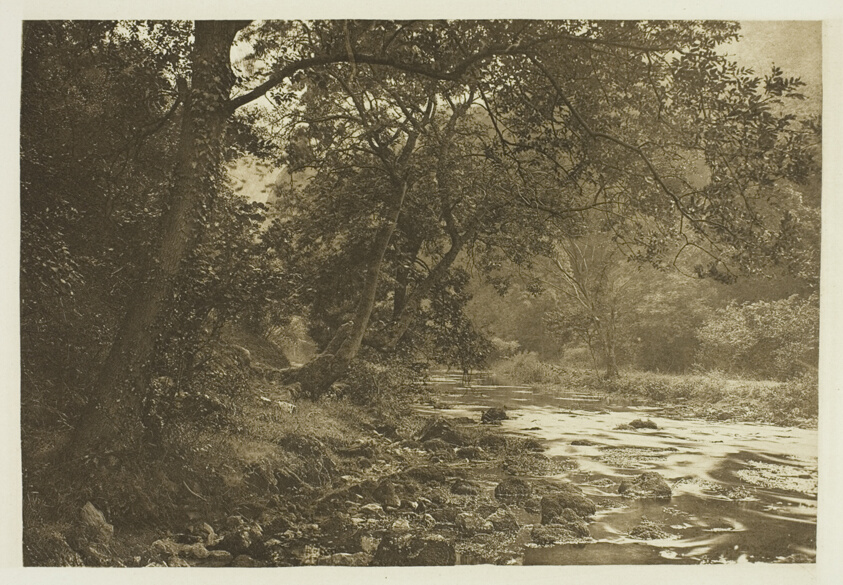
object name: Photograph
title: Near Reynard's Cave, Dove Dale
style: 19th century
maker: Peter Henry Emerson (English, born Cuba, 1856–1936)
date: 1880s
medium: Photogravure, plate XLVI from the album "The Compleat Angler or the Contemplative Man's Recreation, Volume II" (1888)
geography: England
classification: photogravure; photomechanical process; photography; photograph